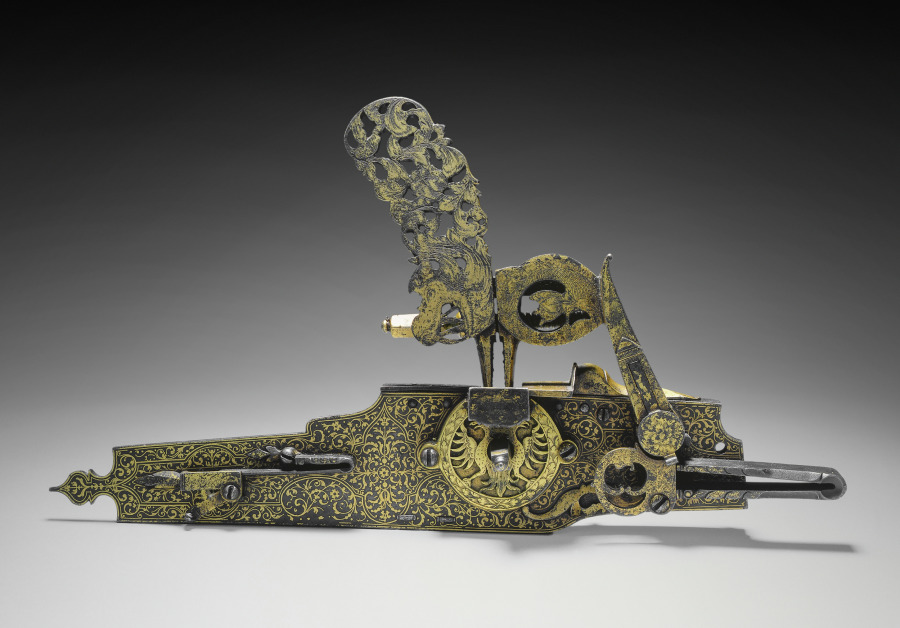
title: Wheel-Lock from a Hunting Rifle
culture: Austria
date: c. 1660–1720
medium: steel, inlaid with gold design of Habsburg eagle, pierced and chiseled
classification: Arms and Armor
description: Originally part of a deluxe weapon, the lock plate's entire surface is inlaid with an exquisite floral pattern in gold. Carefully chiseled, the fanciful hammer takes the form of an animal head crowned by a mass of foliage. The double eagle on the wheel plate suggests the weapon was made for a member of the Habsburg family.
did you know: Invented in the early 1500s, the wheel-lock was a new type of ignition system, the first to be self igniting.